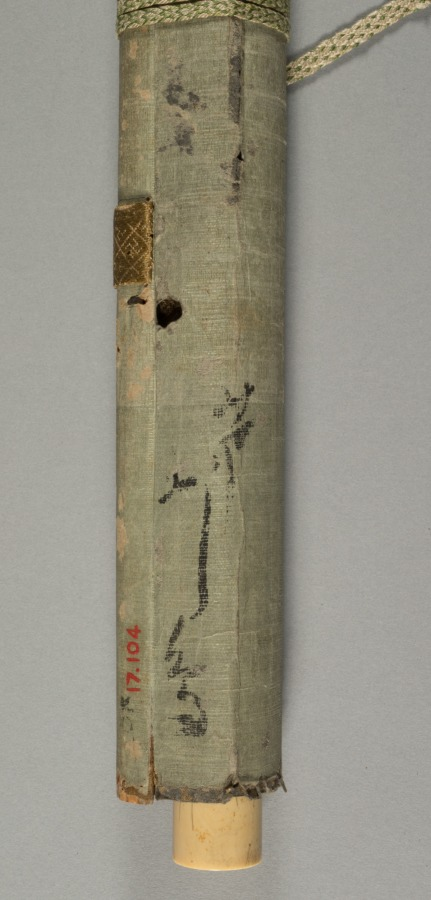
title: Ducks and Reeds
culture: Japan, Momoyama period (1573-1615) to Edo period (1615-1858)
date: early 1600s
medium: hanging scroll; ink on paper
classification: Painting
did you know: This painting was produced by a member of the Kano school.